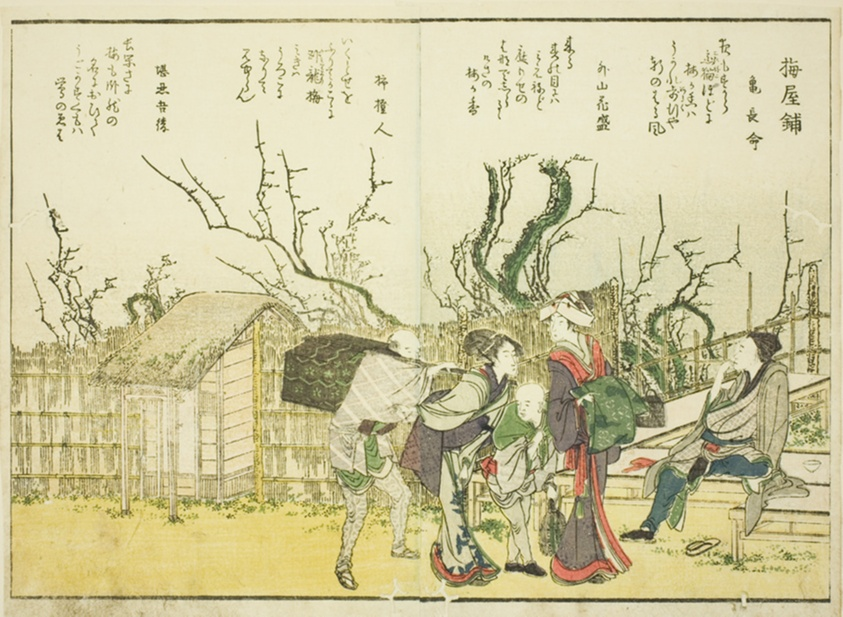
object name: Print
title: Plum Garden (Umeyashiki), from vol. 1 of the illustrated book "Fine Views of the Eastern Capital at a Glance (Toto shokei ichiran)"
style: Japanese (culture or style)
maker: Katsushika Hokusai 葛飾 北斎; Japanese, 1760-1849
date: 1800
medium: Color woodblock print; double-page illustration from book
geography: Japan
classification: woodblock print; print; asian art